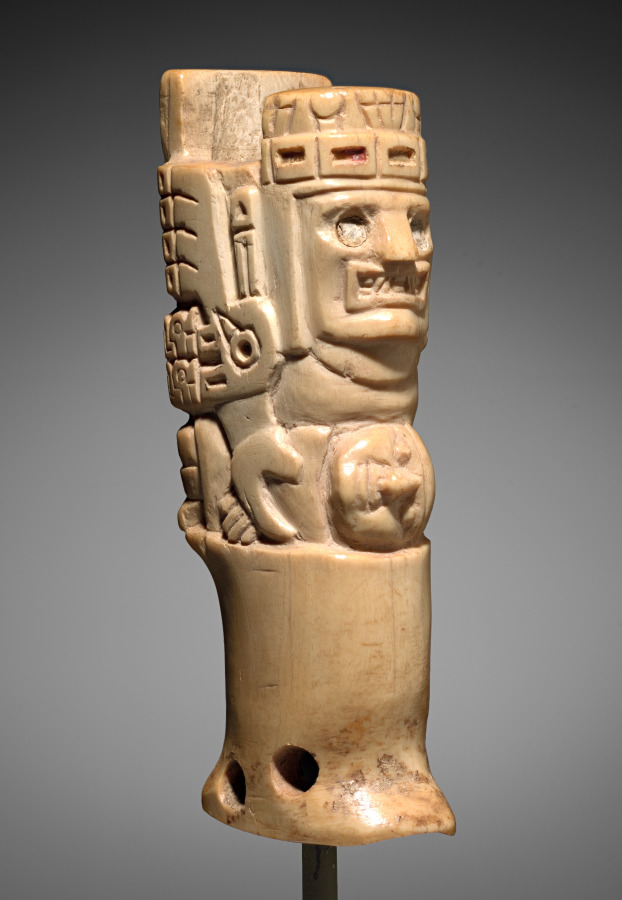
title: Thumb Rest of a Spear Thrower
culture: Andes, Wari people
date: 600–1000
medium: Bone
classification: Implements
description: This object was lashed to a spear thrower, where it served as a thumb rest or grip. The imagery is suited to the use: a supernatural being throttles a human, turning its head to expose its throat to a knife the being holds in one hand. Thus, the scene captures the crucial moment of an offering likely intended to assure the benevolence of divine forces.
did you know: Spear throwers, also called atlatls, use leverage to propel a spear faster and farther.